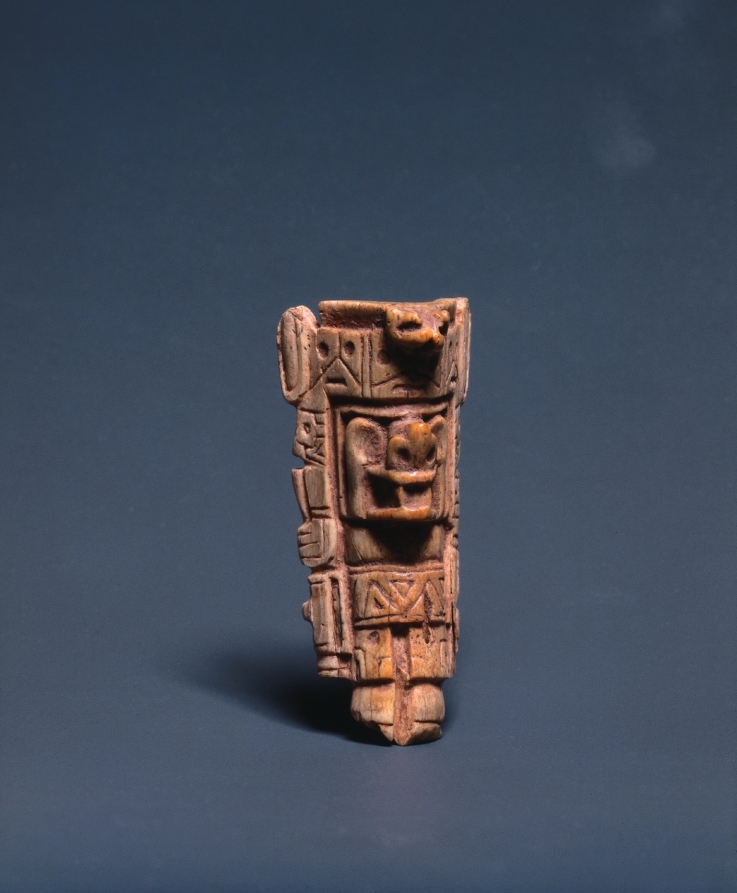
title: Sacrificer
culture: Bolivia, Peru or Chile, Southern Highlands, early Tiwanaku style, 400-1000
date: 400–1000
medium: carved bone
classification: Sculpture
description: Holding an axe in one hand, a human head in the other, this figurine depicts a ritual sacrificer. His fierce mask probably portrays either a puma or a fox. Incised patterns on the figure's body and headdress indicate elaborate tapestry garments. The ancient rituals embodied by this small carving must have been both visually spectacular and emotionally powerful.